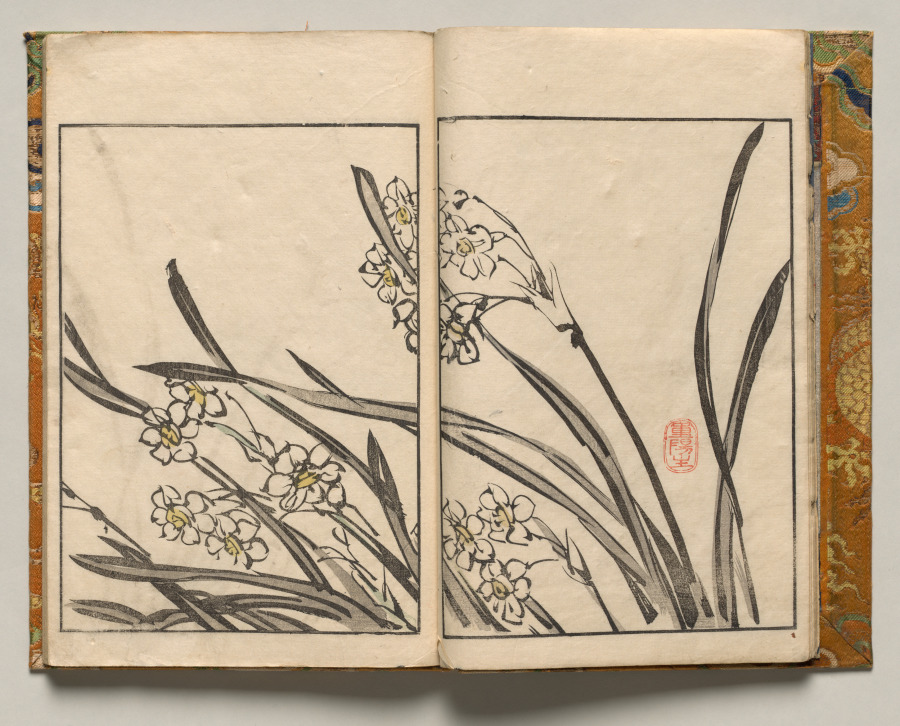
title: Narcissus, Design Three from Shazanrō Picture Book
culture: Japan, Edo period (1615–1868)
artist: Tani Bunchō (Japanese, 1763–1841)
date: 1816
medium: Woodblock-printed book; ink and color on paper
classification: Bound Volume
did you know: Shazanrō was one of Tani Bunchō's style names.